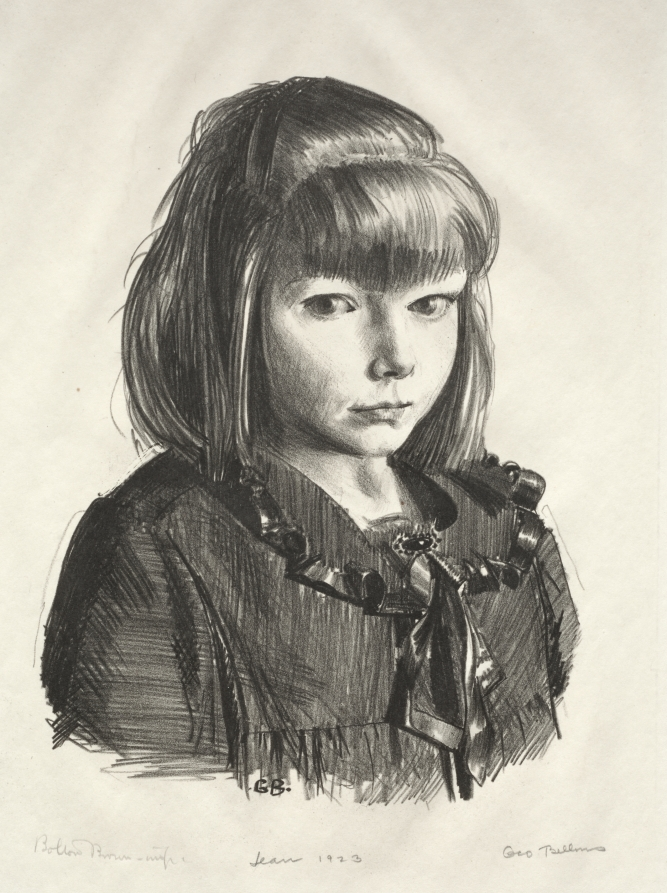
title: Jean 1923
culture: America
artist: George Bellows (American, 1882–1925)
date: 1923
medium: lithograph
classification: Print